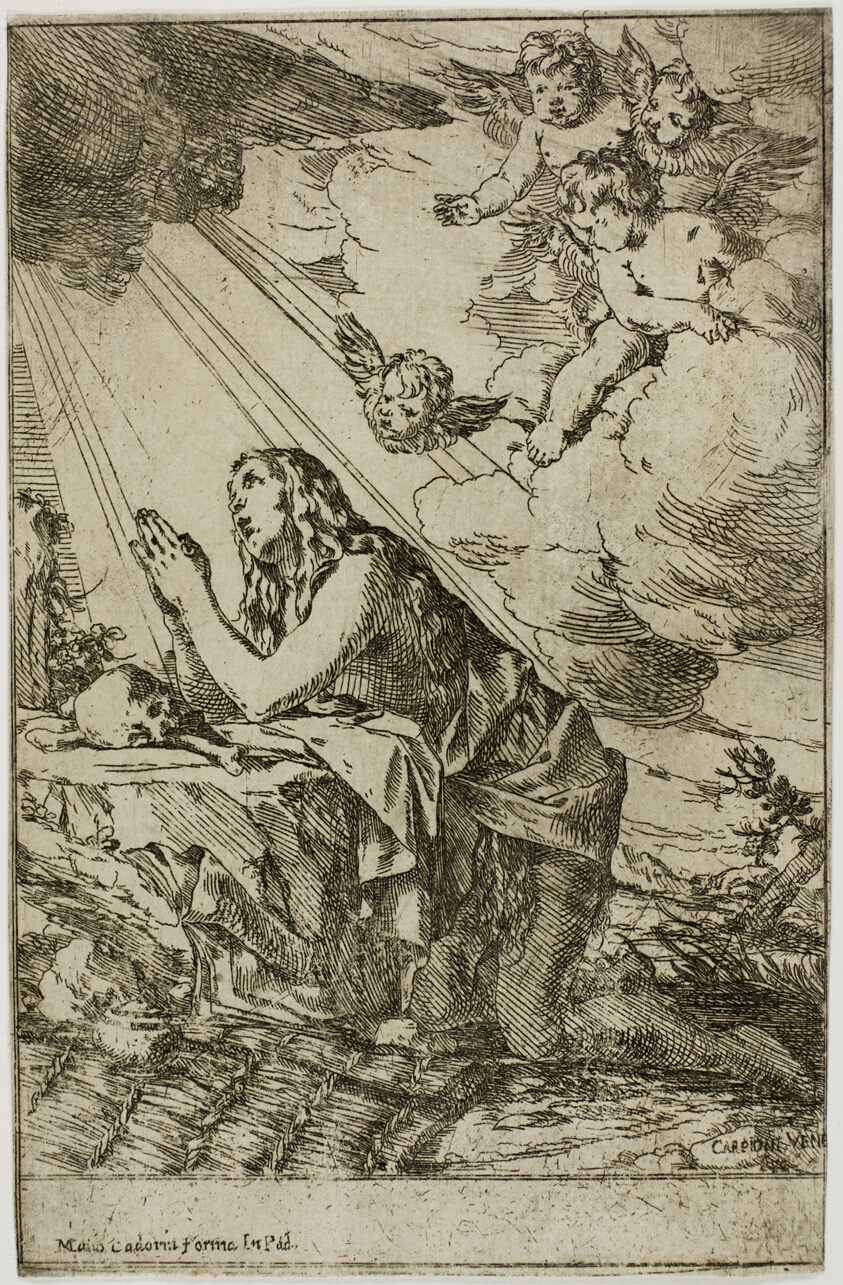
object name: Print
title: The Magdalen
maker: Giulio Carpioni (Italian, 1613-1678)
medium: Etching on ivory laid paper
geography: Italy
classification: etching; print; prints and drawing